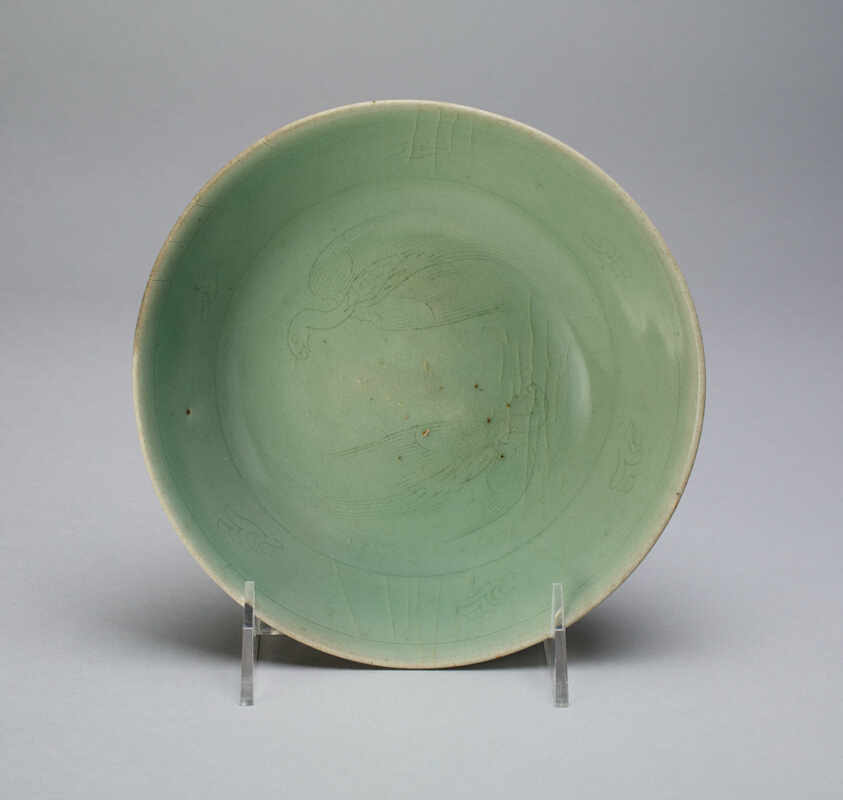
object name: Vessel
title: Bowl with Two Phoenixes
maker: Korea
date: Goryeo dynasty (918–1392), early 12th century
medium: Celadon-glazed stoneware with underglaze incised decoration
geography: Korea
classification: stoneware; asian art; ceramics; vessel